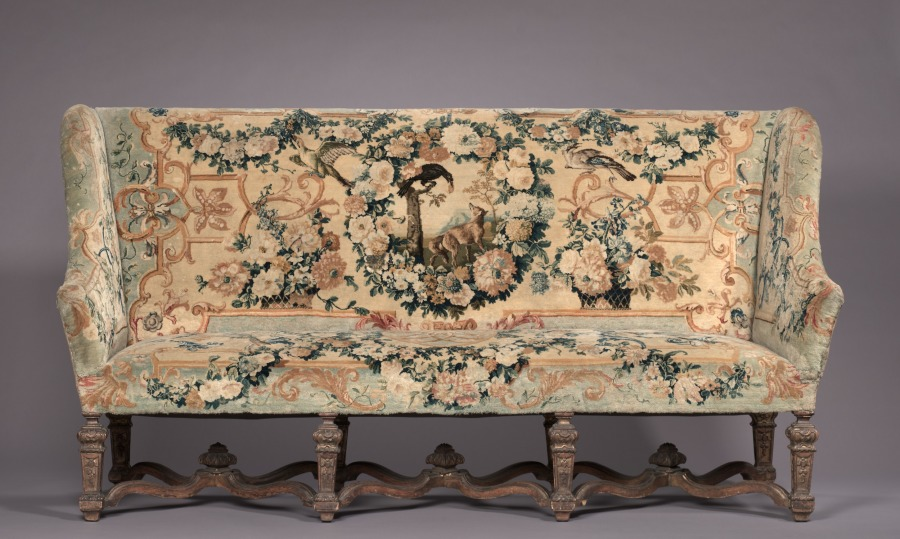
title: Set of Four Armchairs and Settee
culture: France, 18th century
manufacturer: Royal Savonnerie Manufactory, Chaillot Workshops (French, est. 1627)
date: c. 1715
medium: carved wood, Savonnerie knotted-pile (symmetrical rug knot) upholstery; wool, hemp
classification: Furniture and woodwork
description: These chairs belong to a suite that includes a settee (also in the CMA’s collection) and a tapestry made for a count and countess to mark their wedding in 1717. Furniture of this scale was usually placed against the wall in grand reception halls, more as a display of wealth than for use. Upholstered in Savonnerie tapestries, this suite was among the most treasured and expensive example anyone could own and was typically reserved for royalty. To add decorative and intellectual interest to the textiles, weavers incorporated symbols depicting various stories from the Fables of Jean de La Fontaine, published from 1668 to 1694 and largely adapted from Aesop and other early storytellers.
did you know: The Savonnerie factory can trace its origins to a small carpet studio which set up shop in 1615 south of Paris in a factory that had formerly made soap (savon in French), hence the name Savonnerie.